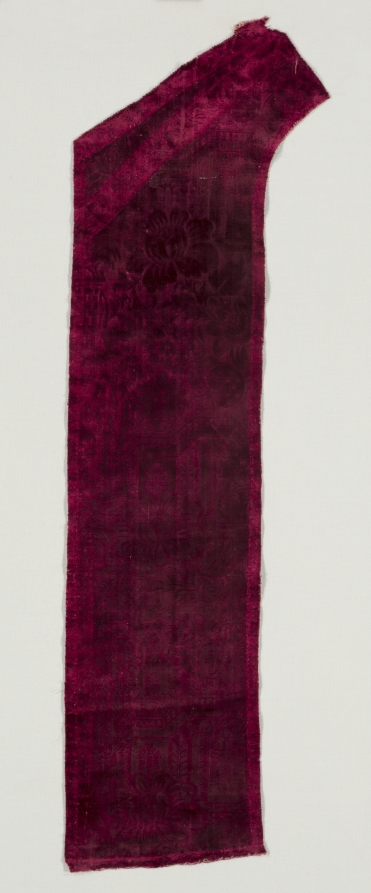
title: Fragments of a Chasuble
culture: Italy, 17th century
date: 1600s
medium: velvet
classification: Velvet